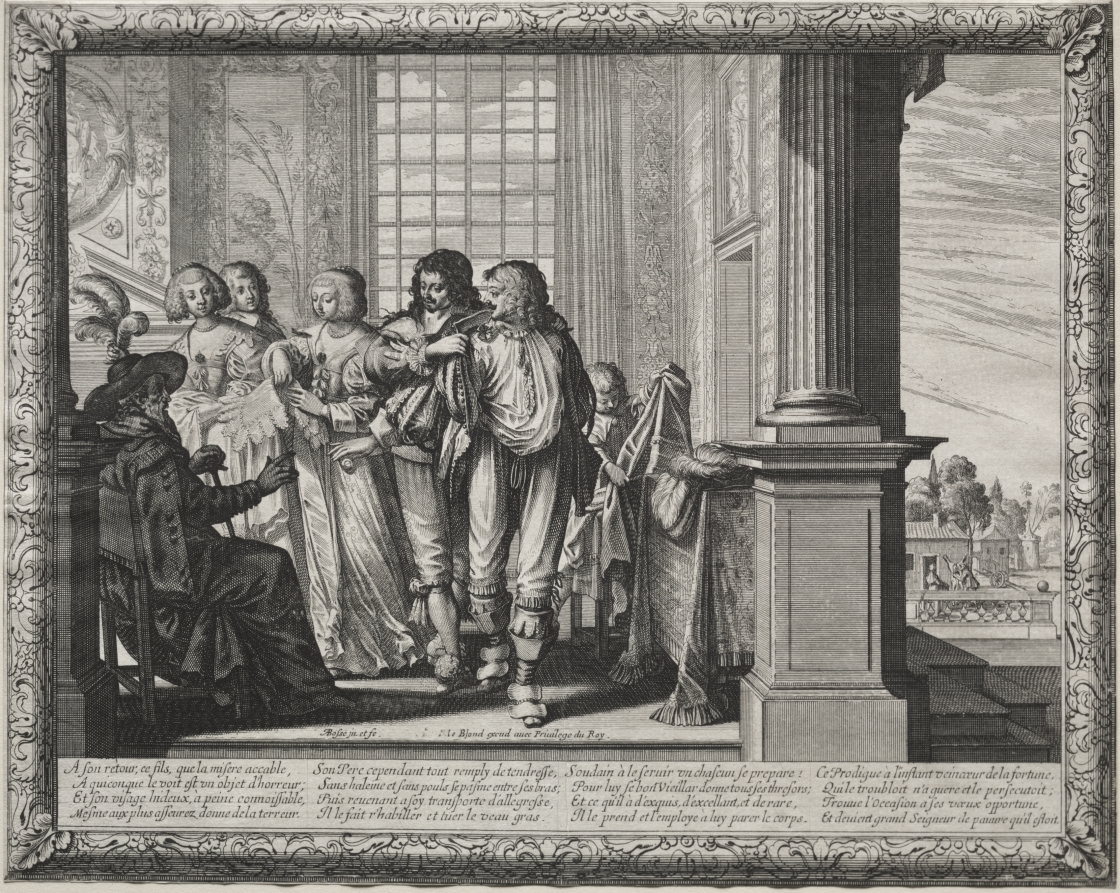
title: The Prodigal Son: Dressing for the Feast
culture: France, 17th century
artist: Abraham Bosse (French, 1602–1676)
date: 1635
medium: etching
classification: Print